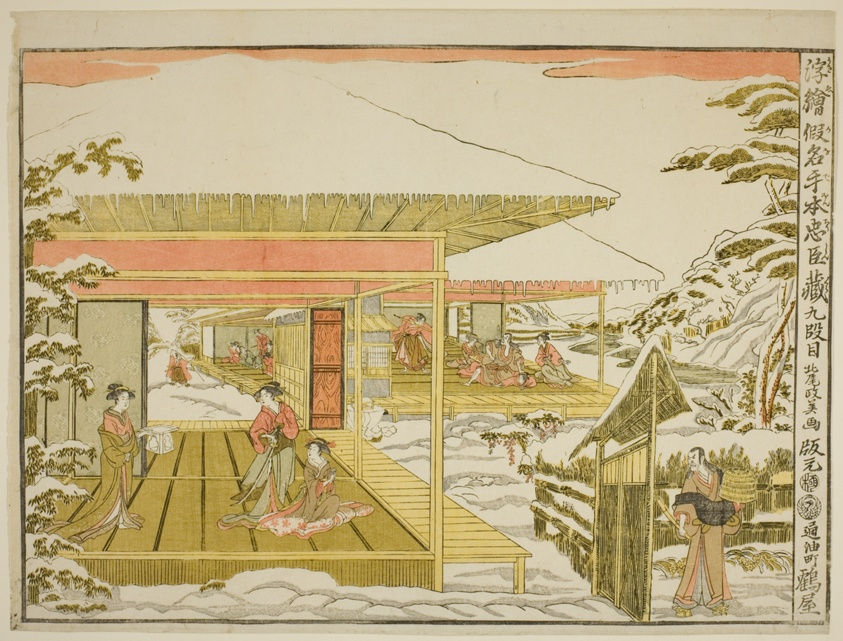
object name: Print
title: Act IX (Kudanme), from the series "Perspective Pictures of the Storehouse of Loyal Retainers (Uki-e kanadehon Chushingura)"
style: Japanese (culture or style), edo (japanese period)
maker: Kitao Masayoshi (Kuwagata Keisai) (Japanese, 1764–1824)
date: c. 1791/94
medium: Color woodblock print; horizontal o-oban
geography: Japan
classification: woodblock; print